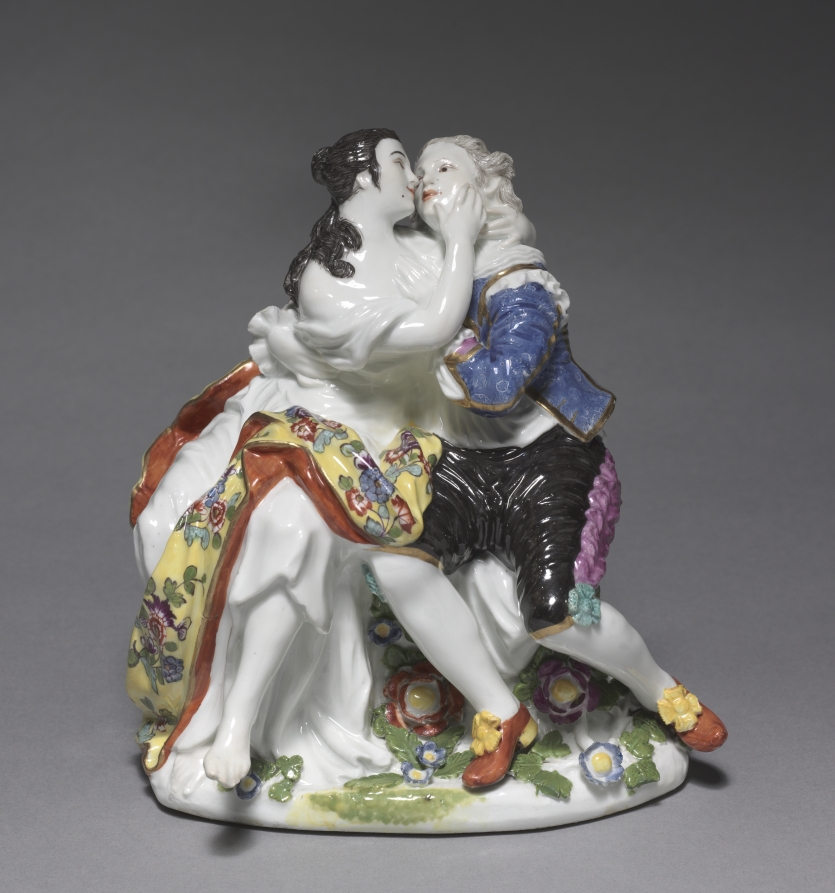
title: The Lovers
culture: Germany, Meissen, 18th century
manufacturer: Meissen Porcelain Factory (German, est. c. 1710)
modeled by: Johann Friedrich Eberlein (German, 1696–1749)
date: c. 1740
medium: porcelain with enamel decoration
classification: Ceramic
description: Though closely related to the style of modeling developed at Meissen by Kaendler, this group was executed by his chief assistant, Eberlein. The intense colors of the figural decorations are characteristic of Meissen production before about 1750.